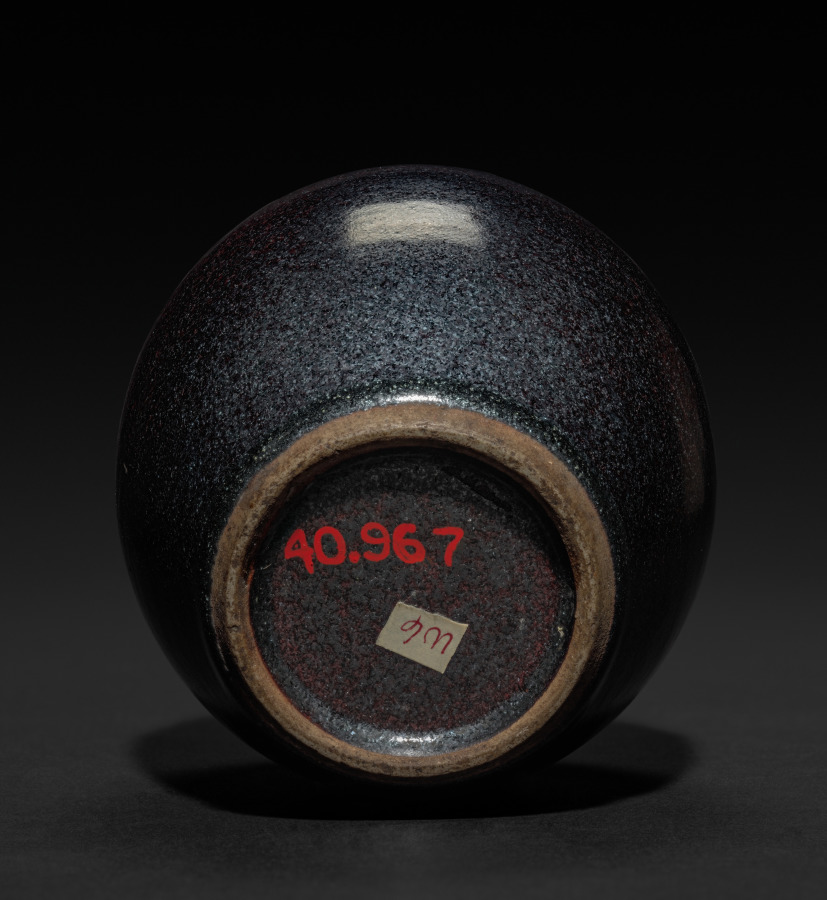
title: Jar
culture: China, Qing dynasty (1644–1911), Qianlong reign (1736–95)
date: 1736–95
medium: porcelain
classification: Ceramic